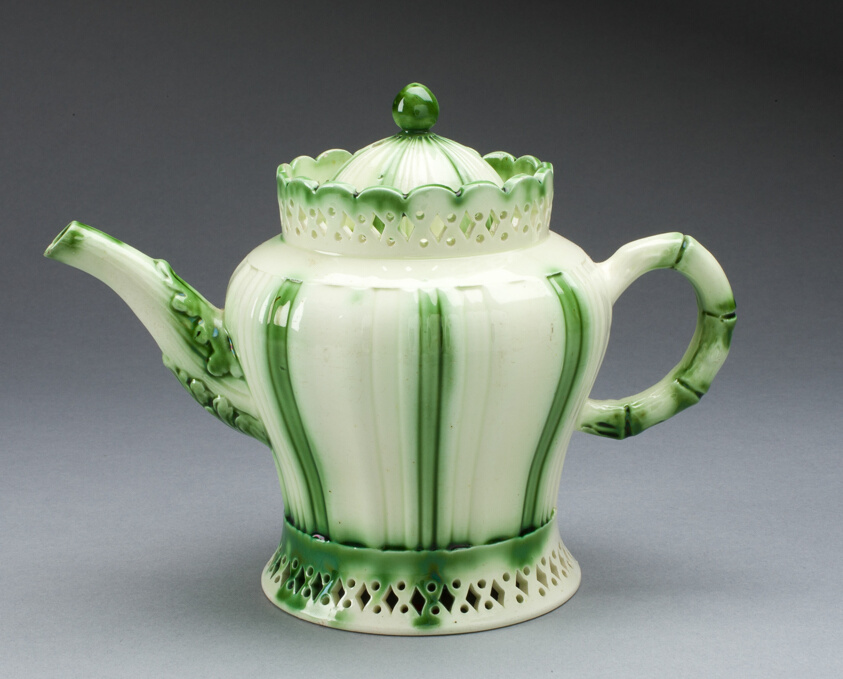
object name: Ceramics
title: Teapot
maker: Staffordshire or Yorkshire, England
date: c. 1780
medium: Lead-glazed earthenware (creamware)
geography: Staffordshire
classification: teapot; creamware; ceramics; earthenware; european decorative arts; lead-glazed earthenware